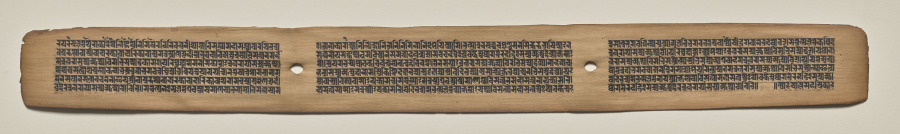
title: Text, Folio 135 (recto), from a Manuscript of the Perfection of Wisdom in Eight Thousand Lines (Ashtasahasrika Prajnaparamita-sutra)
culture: Eastern India, Bihar, Vikramashila Monastery. Painting: Nepal, Kathmandu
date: Sunday, September 14, 1119 (year 239 of the Newar Samvat in the month of Ashvina)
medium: gum tempera and ink on palm leaves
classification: Painting